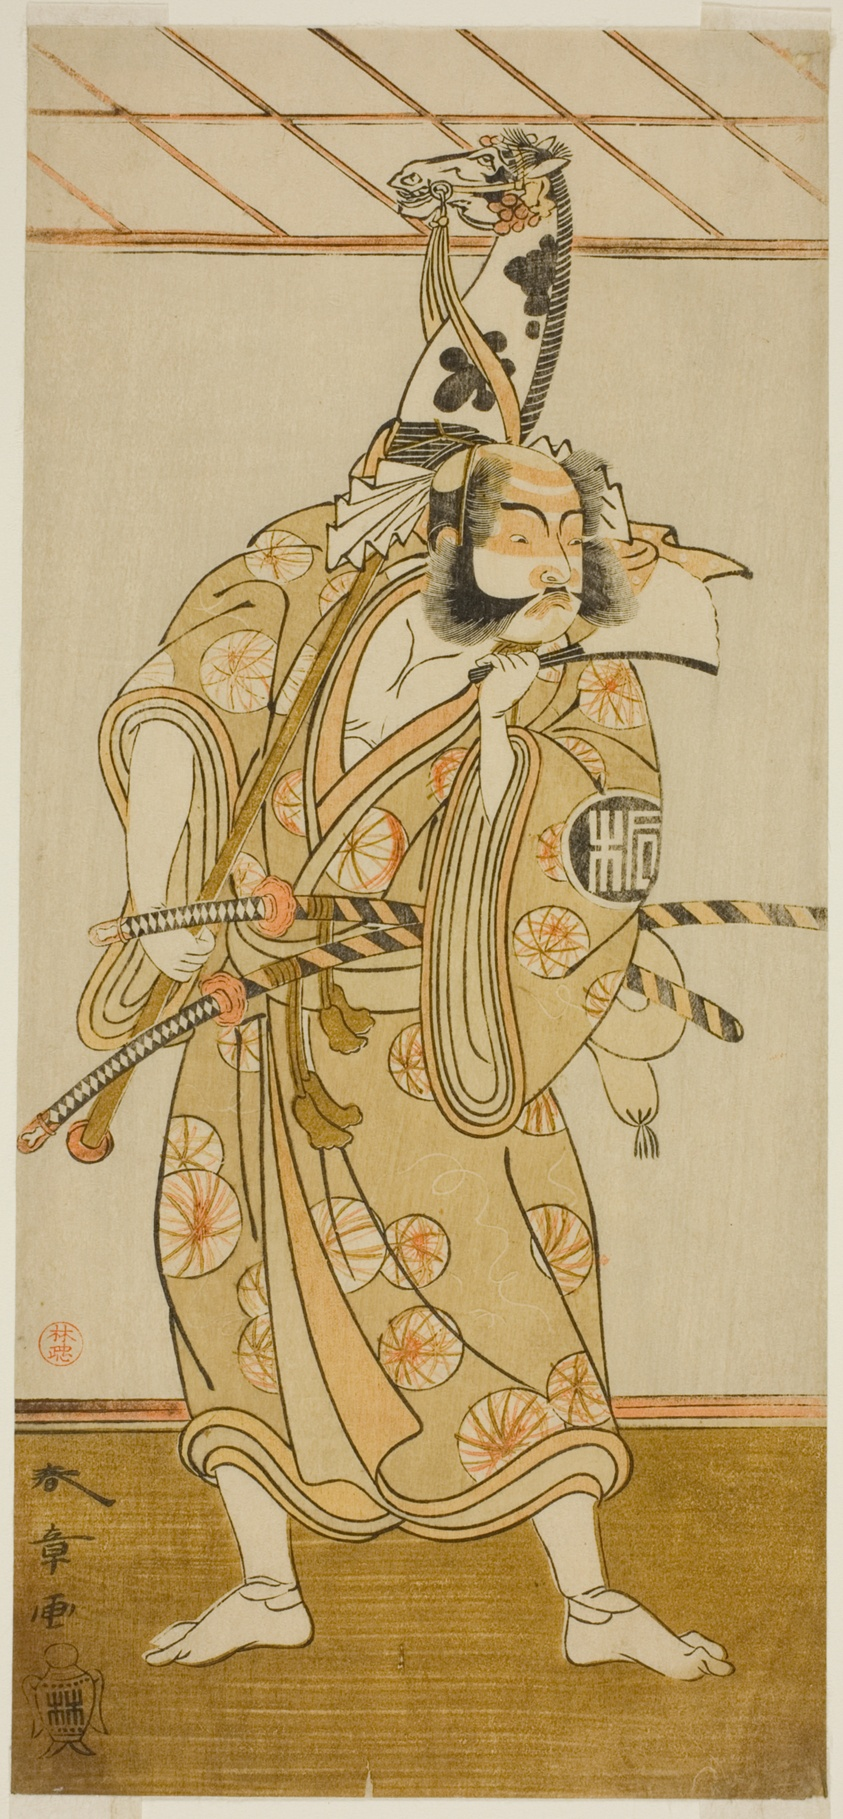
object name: Print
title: The Actor Arashi Sangoro II as Asahina Saburo in the Play Iro Maki-e Soga no Sakazuki, Performed at the Morita Theater in the First Month, 1773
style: Japanese (culture or style)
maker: Katsukawa Shunsho 勝川 春章; Japanese, 1726-1792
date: c. 1773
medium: Color woodblock print; hosoban; from a multisheet composition (?)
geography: Japan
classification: woodblock print; print; asian art